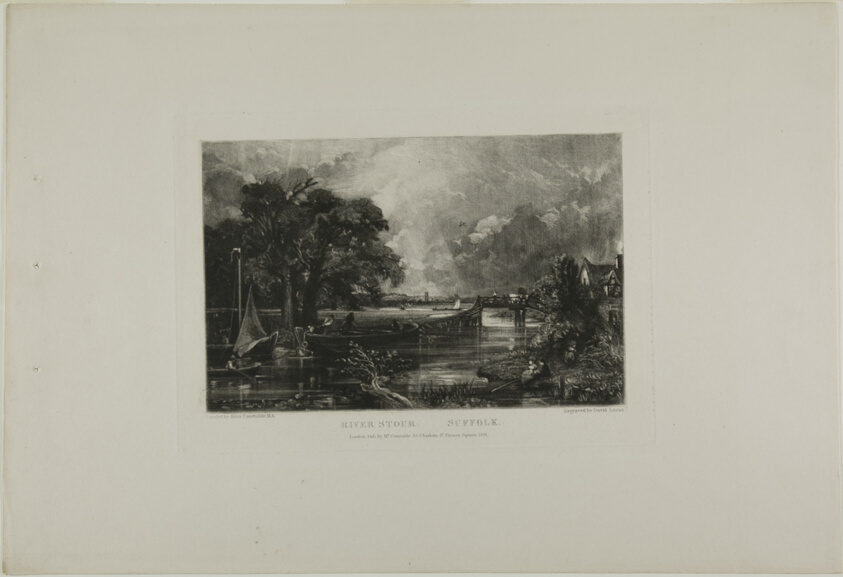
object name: Print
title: River Stour, Suffolk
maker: David Lucas (English, 1802-1881); after John Constable (English, 1776-1837)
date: 1830, published 1831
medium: Mezzotint in black ink on heavy ivory wove paper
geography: England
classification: mezzotint; print; prints and drawing